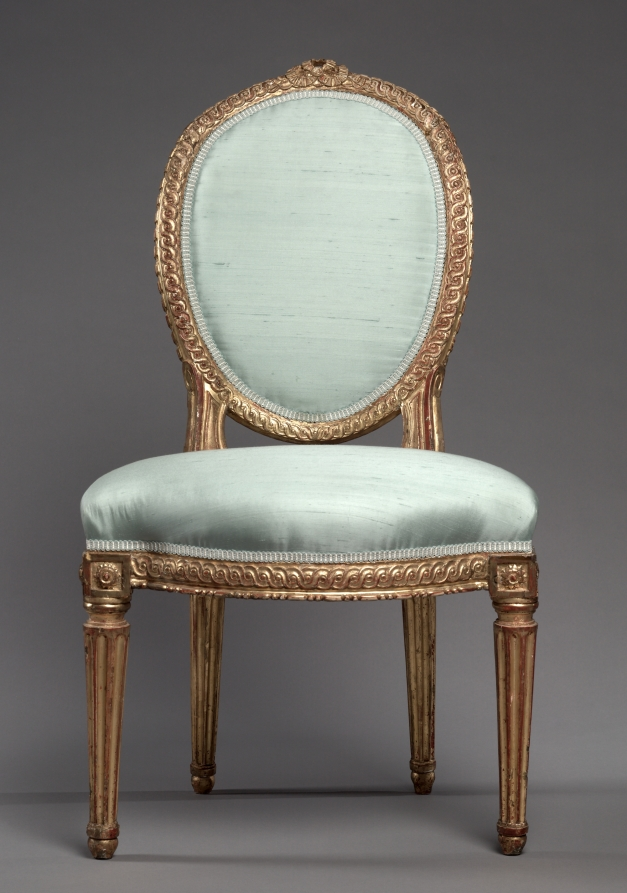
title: Side Chair (1 of 2)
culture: France, style of Louis XVI, 18th century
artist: Jean Baptiste fils Lelarge (French, 1743–1802)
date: 1700s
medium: gilded wood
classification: Furniture and woodwork